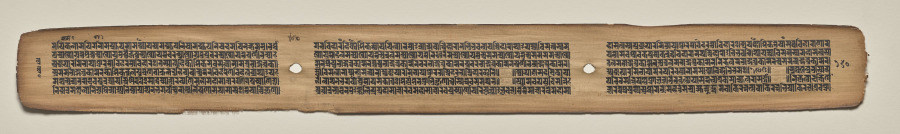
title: Text, folio 160 (verso), from a Manuscript of the Perfection of Wisdom in Eight Thousand Lines (Ashtasahasrika Prajnaparamita-sutra)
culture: Eastern India, Bihar, Vikramashila Monastery. Painting: Nepal, Kathmandu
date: Sunday, September 14, 1119 (year 239 of the Newar Samvat in the month of Ashvina)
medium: gum tempera and ink on palm leaves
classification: Painting